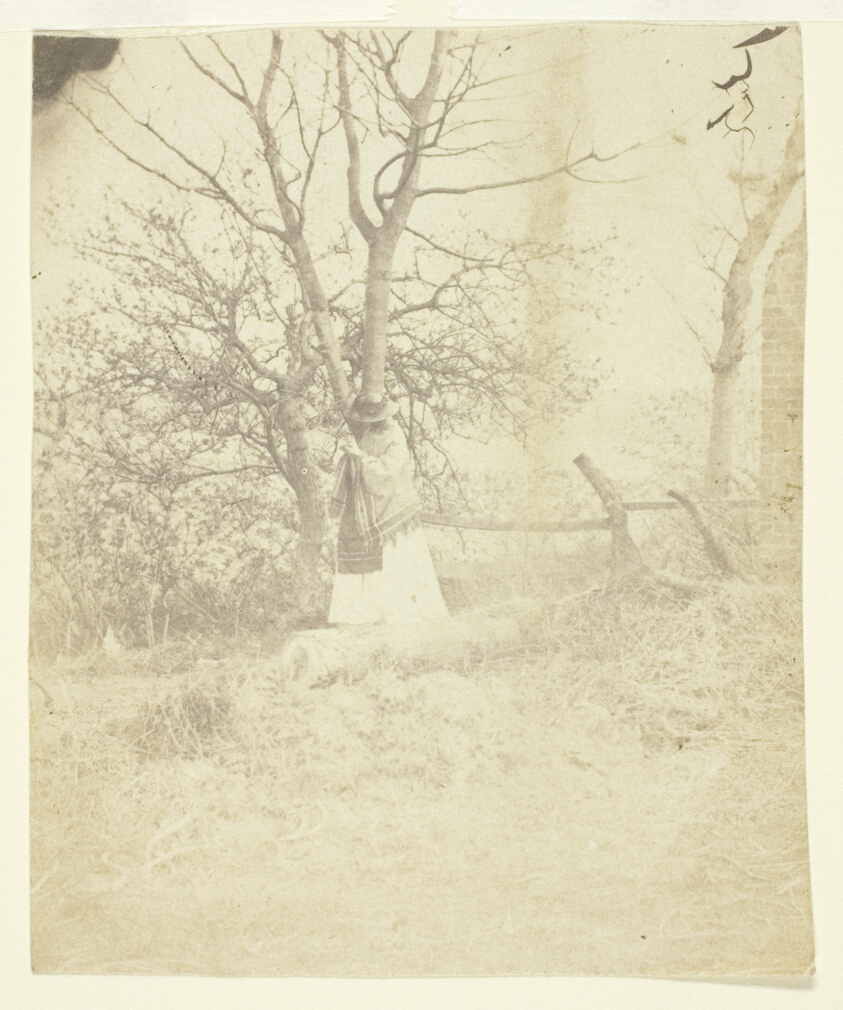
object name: Photograph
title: Mrs. Craik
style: 19th century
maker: Artist unknown, possibly Benjamin Mulock (English, 1829–1863); English, 19th century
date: 1850/59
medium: Calotype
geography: England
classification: salted paper print; photographic process; photography; photograph